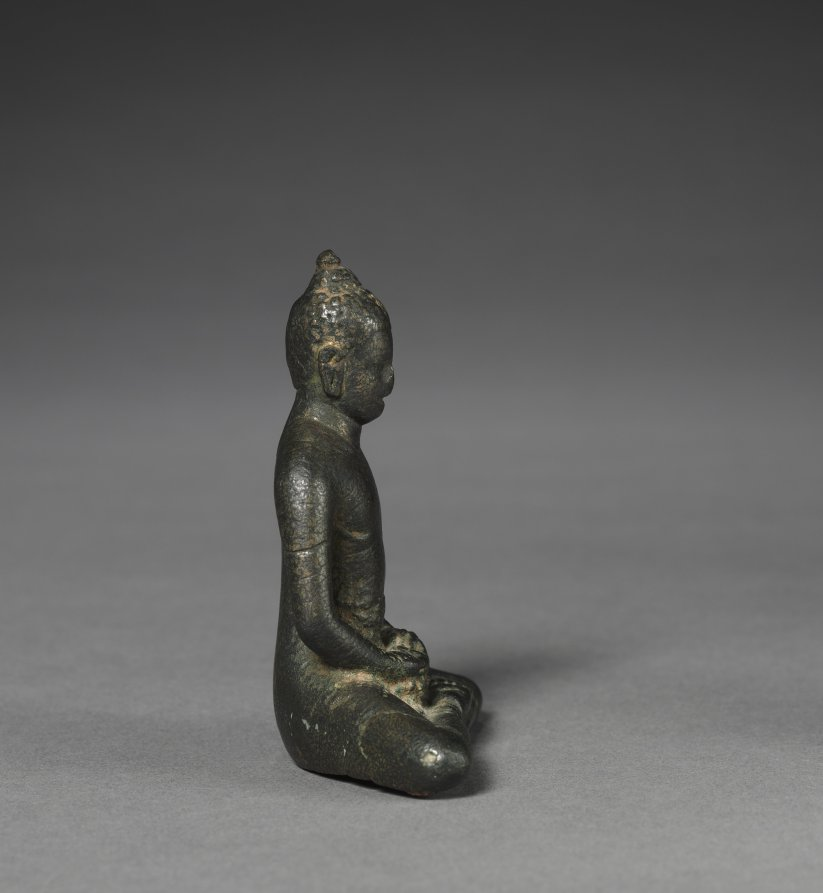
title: Sakyamuni Buddha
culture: Ceylon, Anuradhapura style, 7th-8th Century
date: 600s-700s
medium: bronze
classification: Sculpture